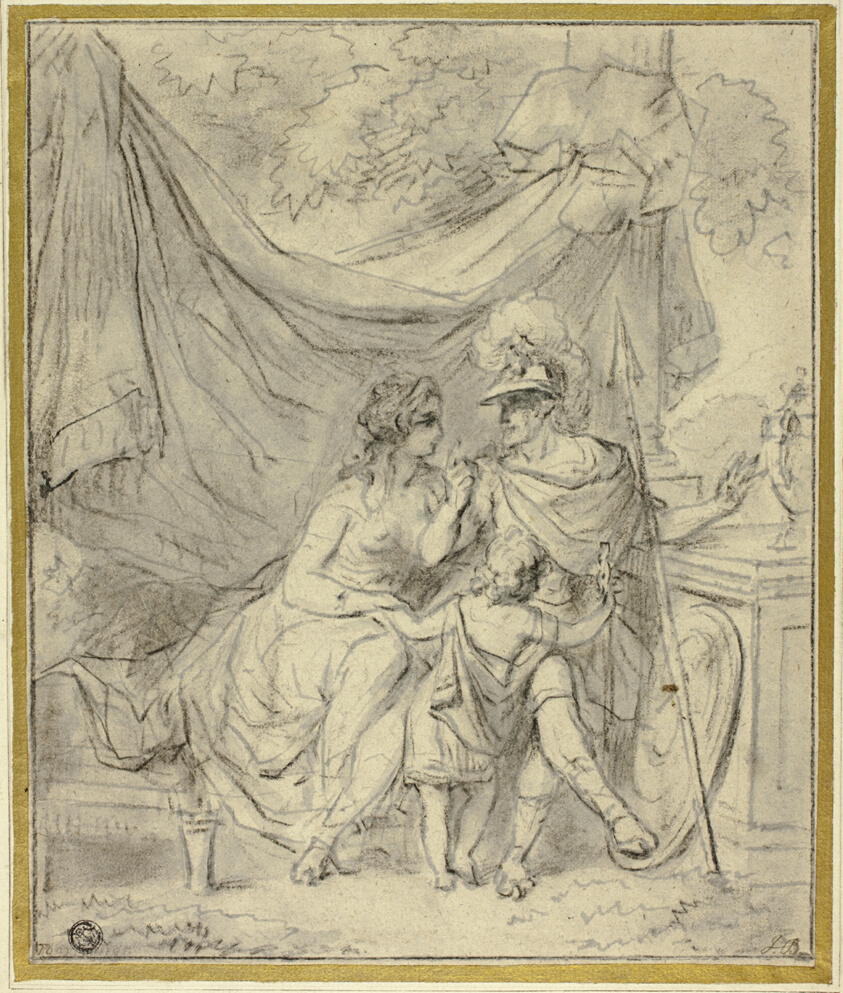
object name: Drawing and Watercolor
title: Mars and Venus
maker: Jacob Toorenvliet (Dutch, 1635/36-1719)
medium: Black chalk with pen and gray ink and brush and gray wash, with touches of graphite, on buff laid paper, tipped onto cream laid paper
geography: Holland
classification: chalk; drawings (visual works); prints and drawing